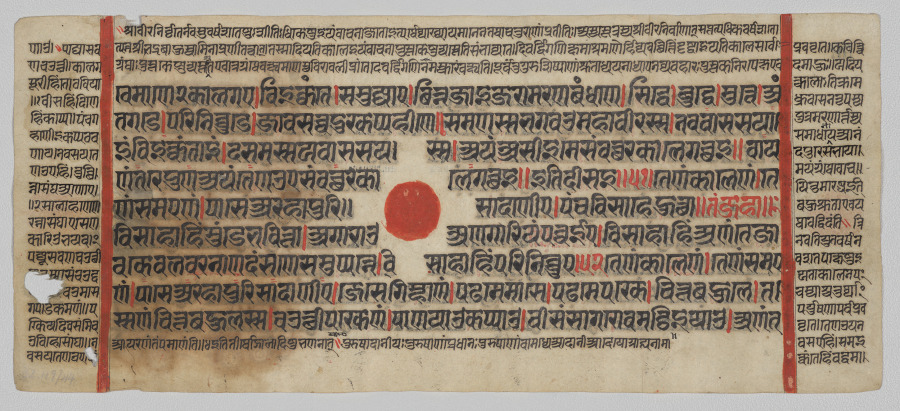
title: Text, Folio 44 (recto), from a Kalpa-sutra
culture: Western India, Gujarat, last quarter of the 15th century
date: c. 1475–1500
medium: Gum tempera, ink, and gold on paper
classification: Painting